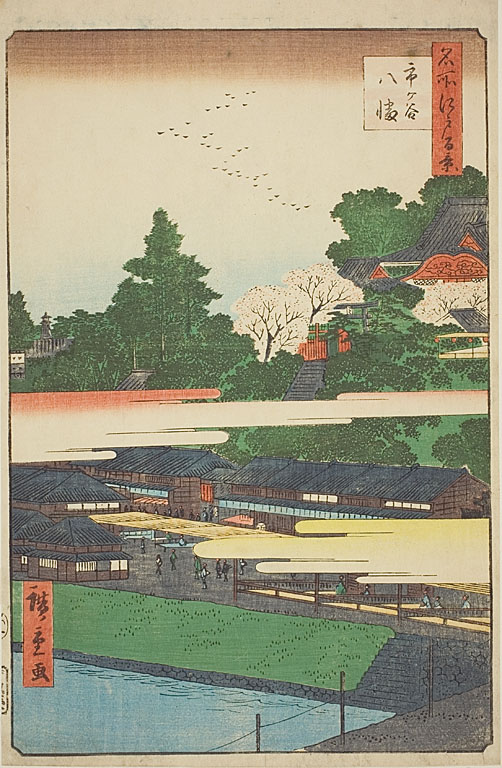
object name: Print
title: Ichigaya Hachiman Shrine (Ichigaya Hachiman), No.41 from the series "One Hundred Famous Views of Edo (Meisho Edo hyakkei)"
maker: Utagawa Hiroshige (Japanese, 1797-1858)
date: 1858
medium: Color woodblock print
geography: Japan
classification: woodblock print; print; asian art